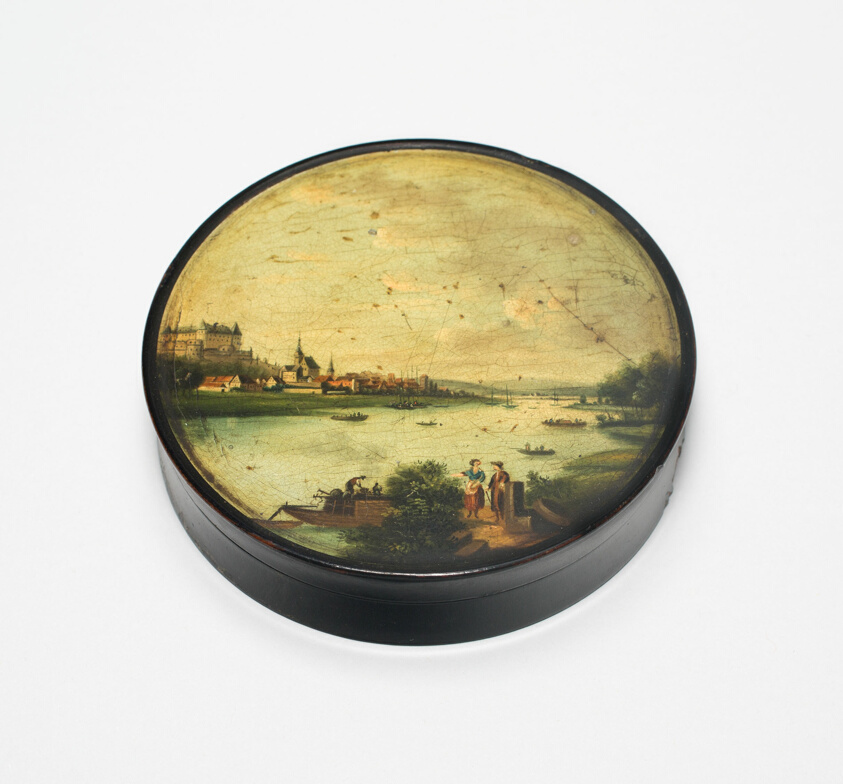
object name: Metalwork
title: Box with Fortress of Sonnenstein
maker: Johann Heinrich Stobwasser (German, 1740-1829)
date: Late 18th century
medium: Paper maché and black lacquer with painted cover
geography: Germany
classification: box; paper; european decorative arts; metalwork